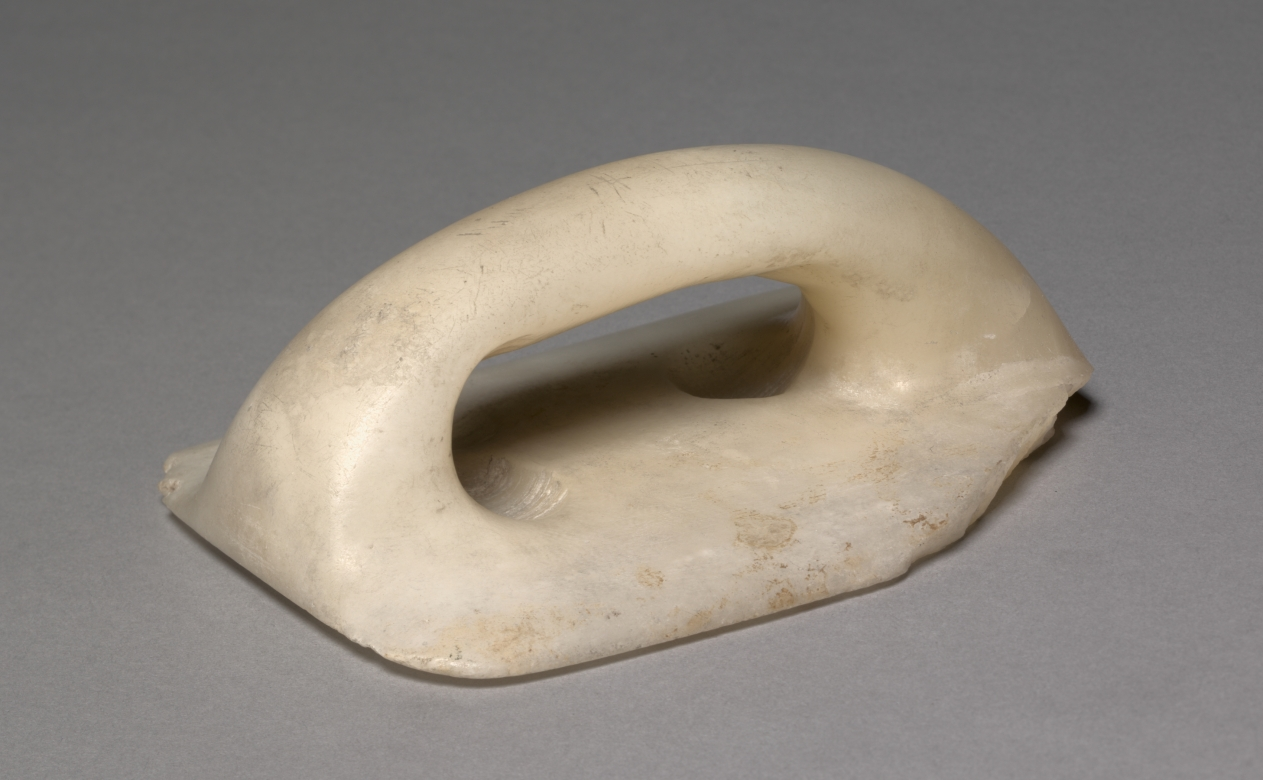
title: Plasterer's Float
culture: Egypt, Middle Kingdom (2040–1648 BCE), Dynasties 12–13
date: 1980–1648 BCE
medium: travertine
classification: Implements